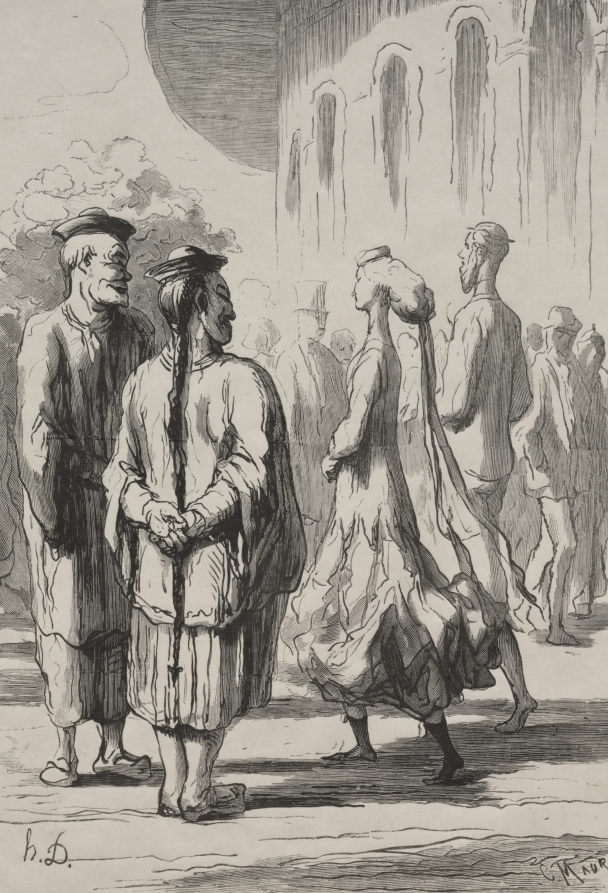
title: At the Universal Exhibition: Who are the real Chinese?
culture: France, 19th century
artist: Honoré Daumier (French, 1808–1879)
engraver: Charles Maurand (French, 1824–1904)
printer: François Louis Schmied (Swiss, 1873–1941)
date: 1867, printed 1920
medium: wood engraving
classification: Print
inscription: Lower margin, in pencil: 40/75 ; red stamp: FLS